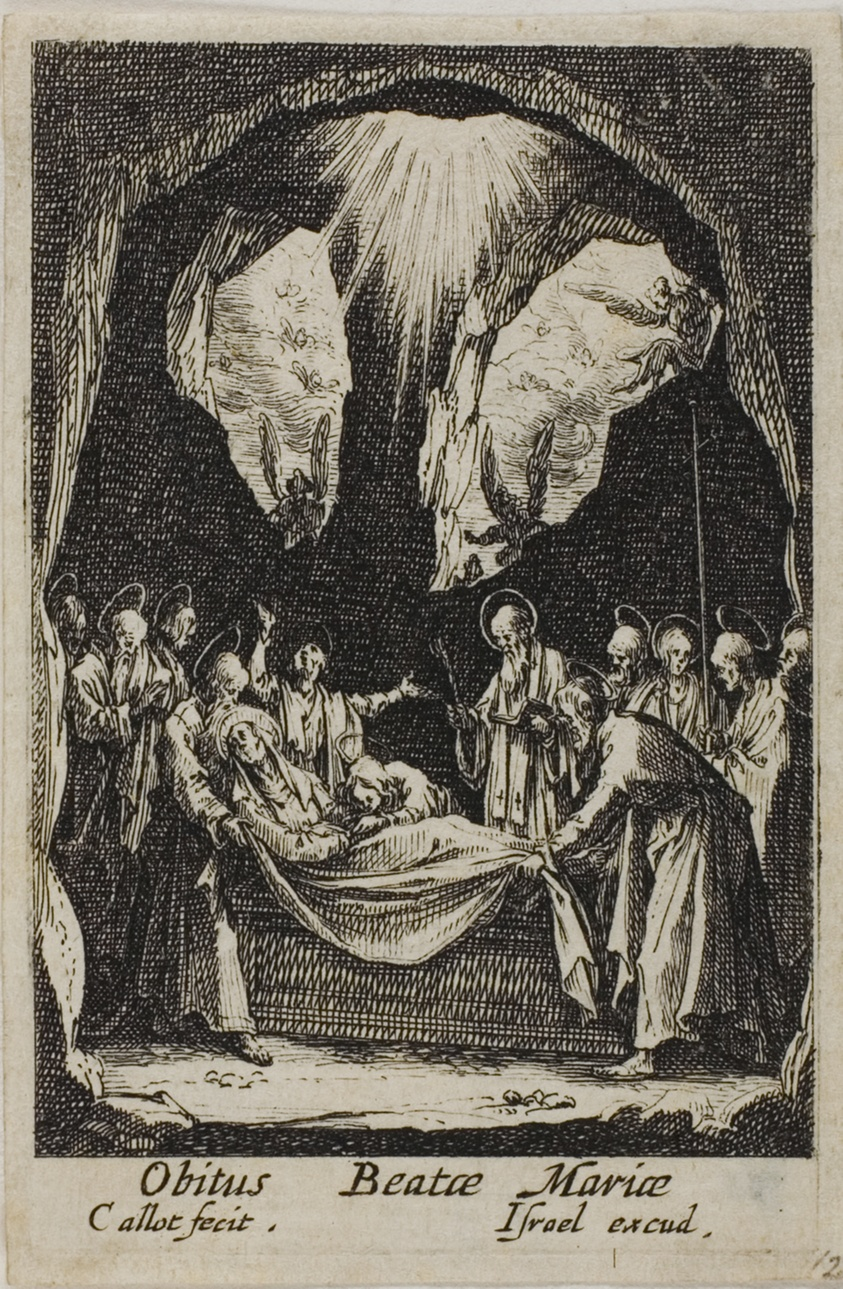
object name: Print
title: The Interment of the Virgin, from The Life of the Virgin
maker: Jacques Callot (French, 1592-1635)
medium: Etching on paper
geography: France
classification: etching; print; prints and drawing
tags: Virgin Mary, Christian subjects, mythology, prints and drawings